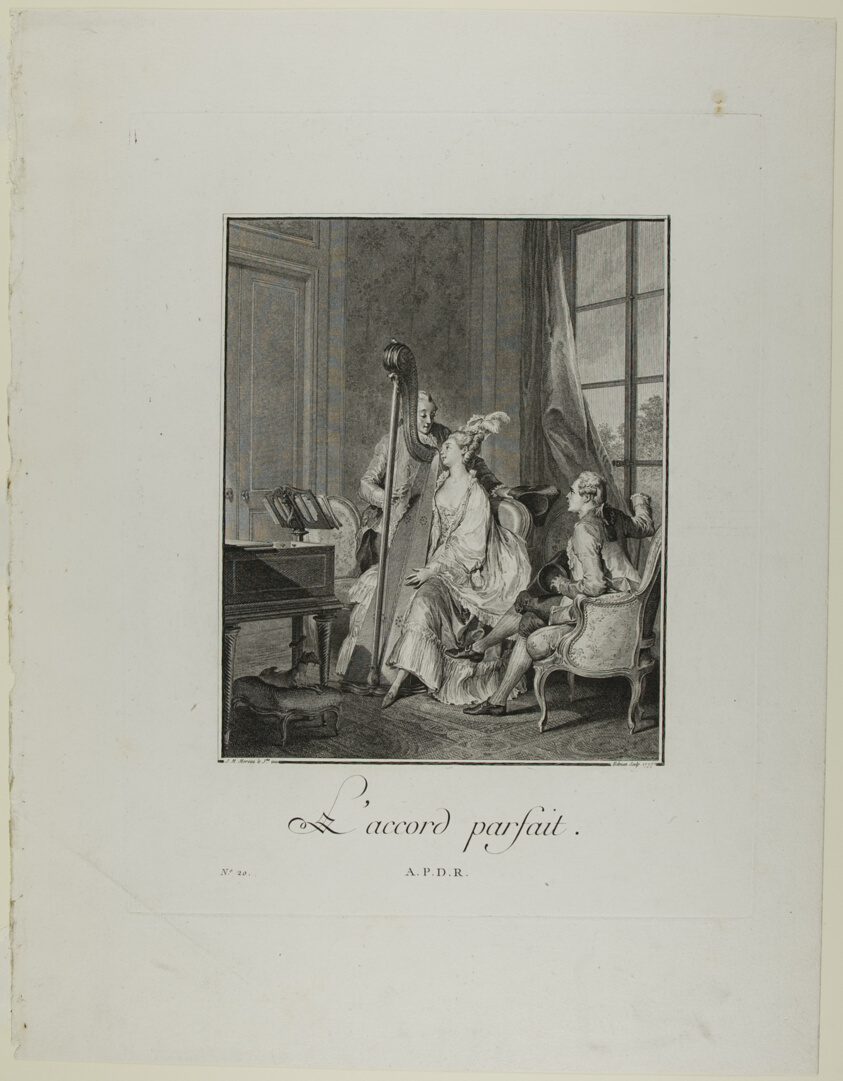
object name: Print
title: Perfect Harmony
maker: Isidor-Stanislas Helman (French, 1743-c. 1806); after Jean Michel Moreau (French, 1741-1814)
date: 1777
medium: Engraving on paper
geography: France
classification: engraving; print; prints and drawing